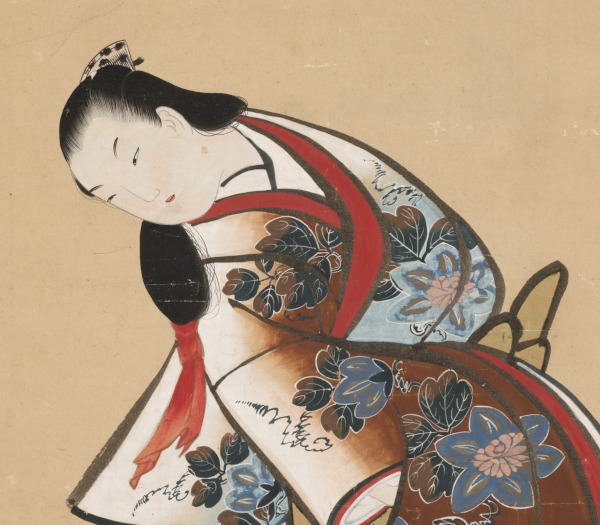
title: Courtesan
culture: Japan, Edo period (1615–1868)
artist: Kaigetsudō Doshin (Japanese, active 1711–1736)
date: early 1700s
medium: hanging scroll; ink and color on paper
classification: Painting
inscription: Signed: Japanese painting for amusement, this was painted by Doshin, the last leaf of Kaigetsu (Nihon giga Kaigetsu matsuyo Doshin kore [o] zu [su]) Sealed: Ando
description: Kaigetsudō Doshin was one of five painters in a studio operating under Kaigetsudō Ando (about 1671–1743) in the Asakusa area of Edo (now Tokyo). The workshop specialized in portraits, like this one, of high-ranking courtesans of the Yoshiwara district. Characteristic of those works, this painting features strong ink delineation of the subject’s twisting form and bold patterns in the kimono, as well as the absence of any sort of setting.